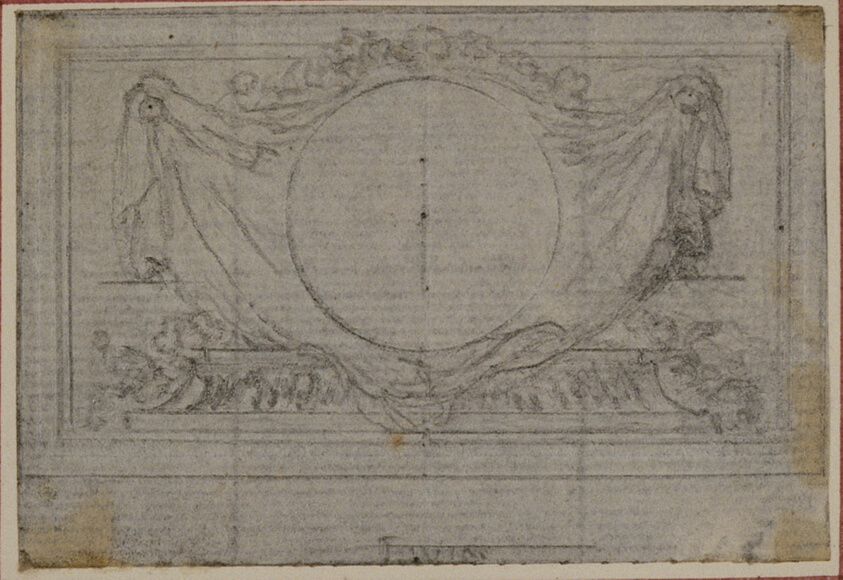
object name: Drawing and Watercolor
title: Study for En Tête Vignette in Tacitus "Tibère, ou Les Six Premiers Livres des Annales", Book V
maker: Hubert François Gravelot (French, 1699-1773)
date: c. 1768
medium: Graphite, on gray laid paper, incised for transfer and perimeter mounted on ivory laid paper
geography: France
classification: graphite; drawings (visual works); prints and drawing